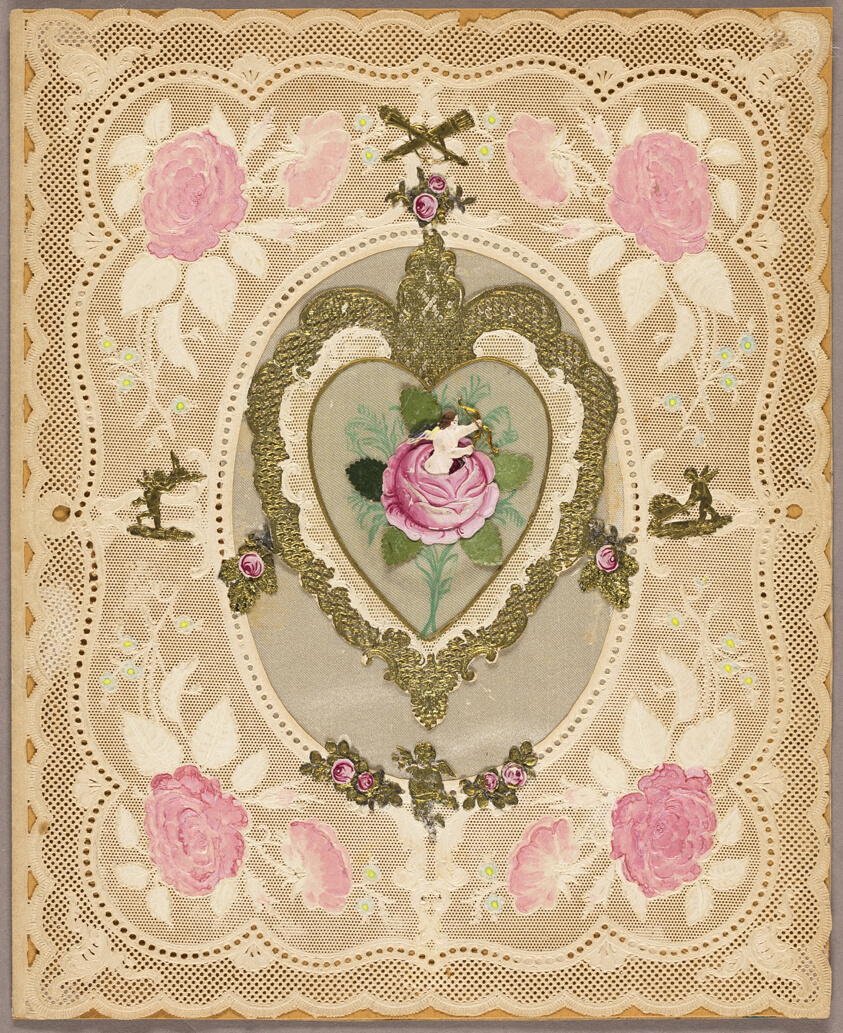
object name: Drawing and Watercolor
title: Untitled Valentine (Pink Flowers and Putti)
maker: Unknown Artist; English, 19th century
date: 1834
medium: Collaged elements on cut and embossed cream paper (lace)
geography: England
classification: collage; valentine; prints and drawing; paper